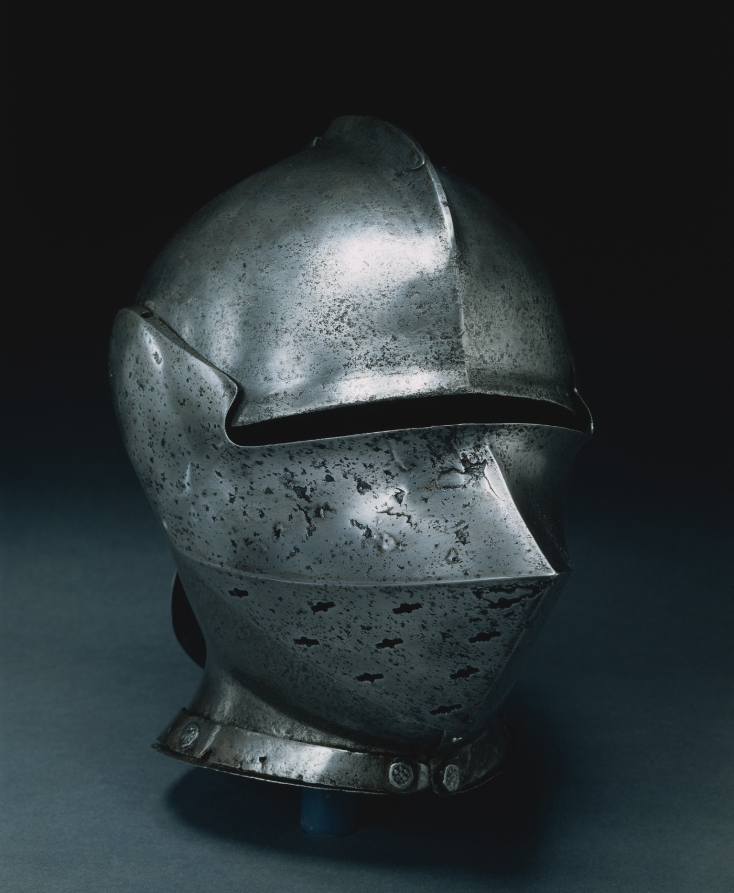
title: Armet à Rondelle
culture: Italy, Milan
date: c. 1460–75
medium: steel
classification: Arms and Armor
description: The armet is a visored helmet with cheekpieces that fasten at the chin. The "rondelle" is the disc at the back of the neck. Its purpose was to protect the point where the two cheekpieces join at the back. This style of helmet was the typical headpiece of the fully armored equestrian knight throughout most of the 1400s.